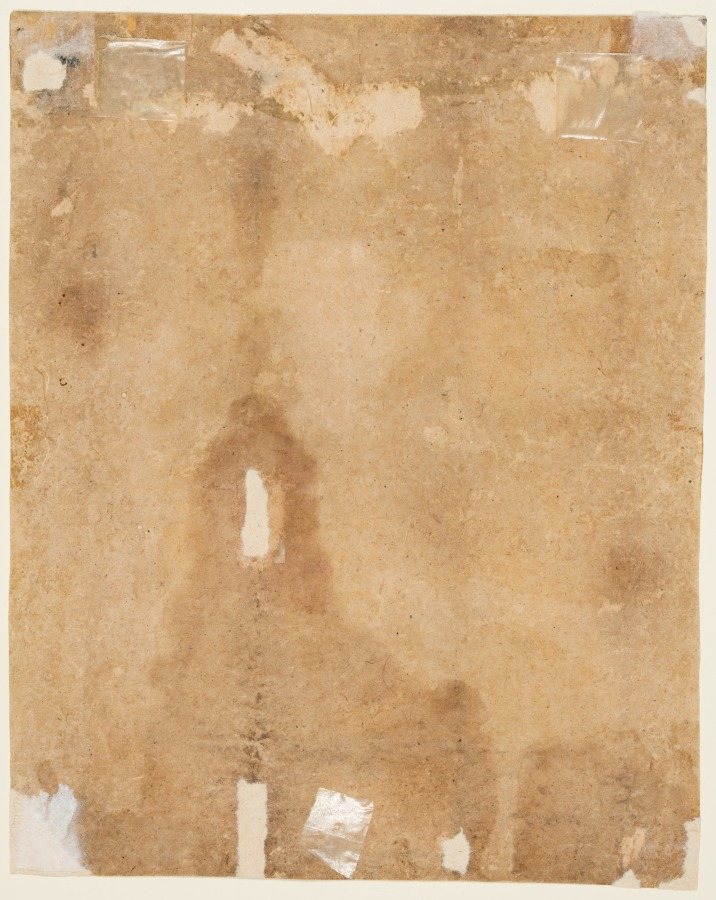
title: A Ruler Seated on a Terrace Worshipping at a Shrine of Radha and Krishna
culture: Central India, Madhya Pradesh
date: c. 1800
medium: gum tempera and gold on paper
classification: Painting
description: A noble clad in a black woolen shawl and a red turban, both with delicate floral embroidery, kneels before a small shrine with icons of Krishna fluting alongside his lover Radha. An attendant dressed in white holds a fly whisk that denotes the kneeling figure’s royal status. The black sky with light horizon suggests that the sun has recently set. In spite of the individualized facial features, this noble remains unidentified.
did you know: Both figures have rosaries of rudraksha beads usually worn by followers of Shiva, instead of Krishna.